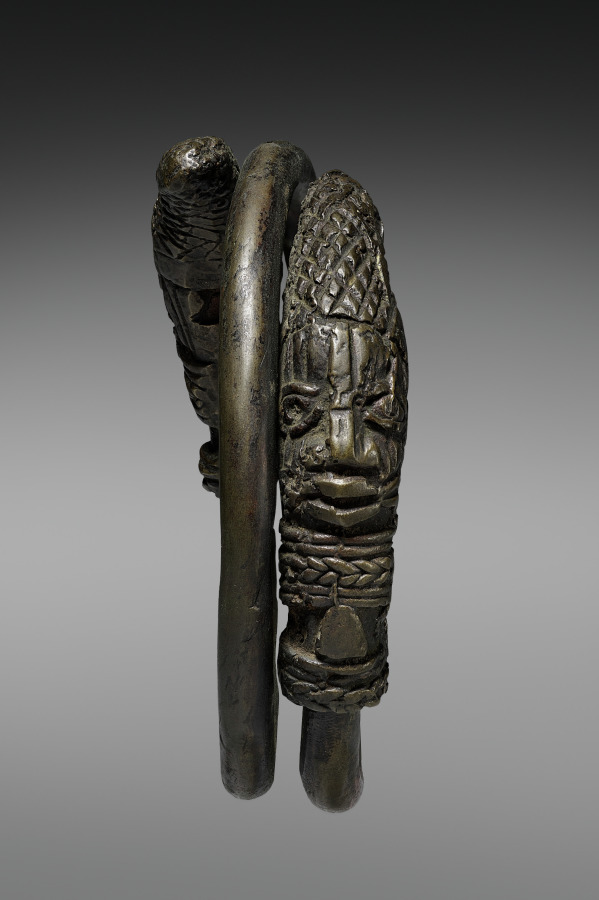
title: Hand Coil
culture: Nigeria, Benin Kingdom, Ẹdo peoples, members of the Igun Eronmwon (royal brasscasters) guild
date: 1800s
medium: Copper alloy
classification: Implements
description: While this looks like a bracelet, it wasn’t worn around a wrist. A chief or titleholder grasped this “hand coil” vertically during the annual Iguẹ festival, during which such men reaffirm their relationship to the Ọba, whose mystical powers are strengthened. An image of a man’s head caps each end of the thick, twisted metal. Repeated human touch rubbed the undecorated lengths bright and shiny. Though small, the coil’s detail is enormous: to capture it, the artist incised the designs in wax during the casting process. They show these men are elites, with necklaces, caps, and whisker-like facial markings.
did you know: This is a unique object; it was made using the lost-wax casting technique, which destroys the wax mold in the creation process.